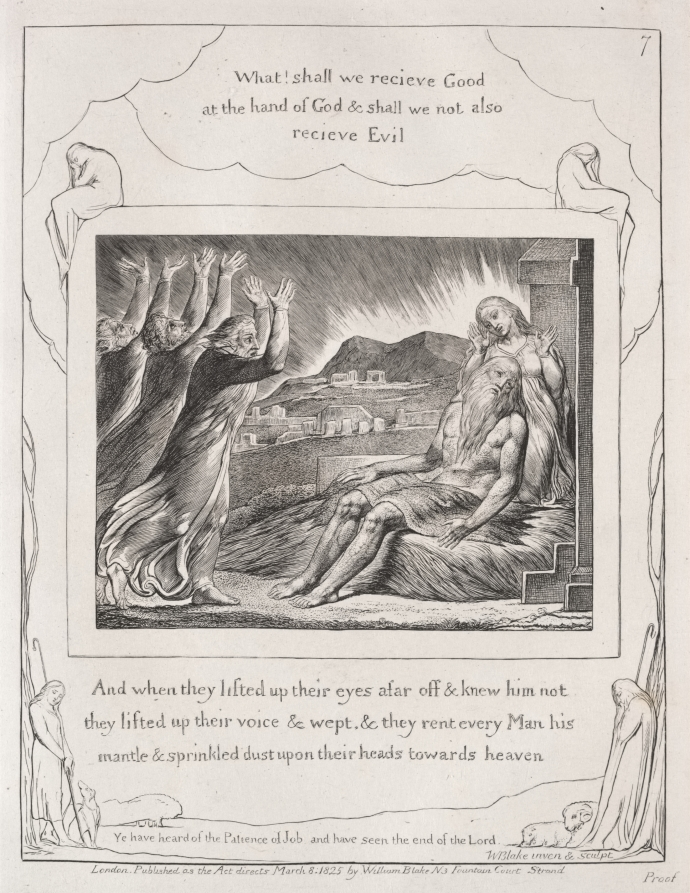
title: The Book of Job: No. 7, And When they had lifted up their eyes afar off and knew him not, they lifted up their voices and wept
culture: England, 19th century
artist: William Blake (British, 1757–1827)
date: 1825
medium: engraving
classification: Print